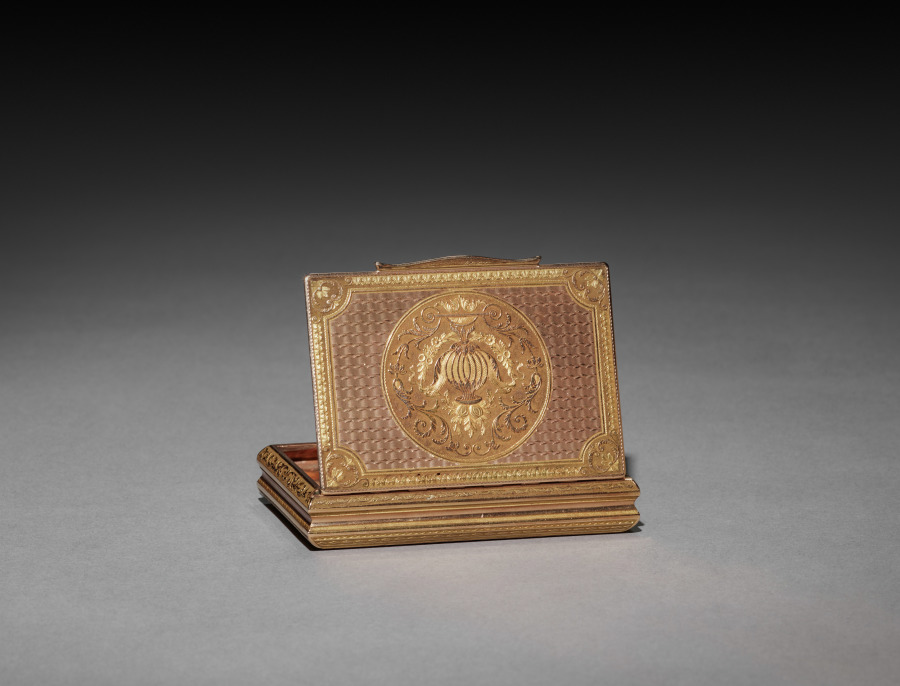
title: Snuff Box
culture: Switzerland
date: c. 1825–1850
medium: gold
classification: Miscellaneous